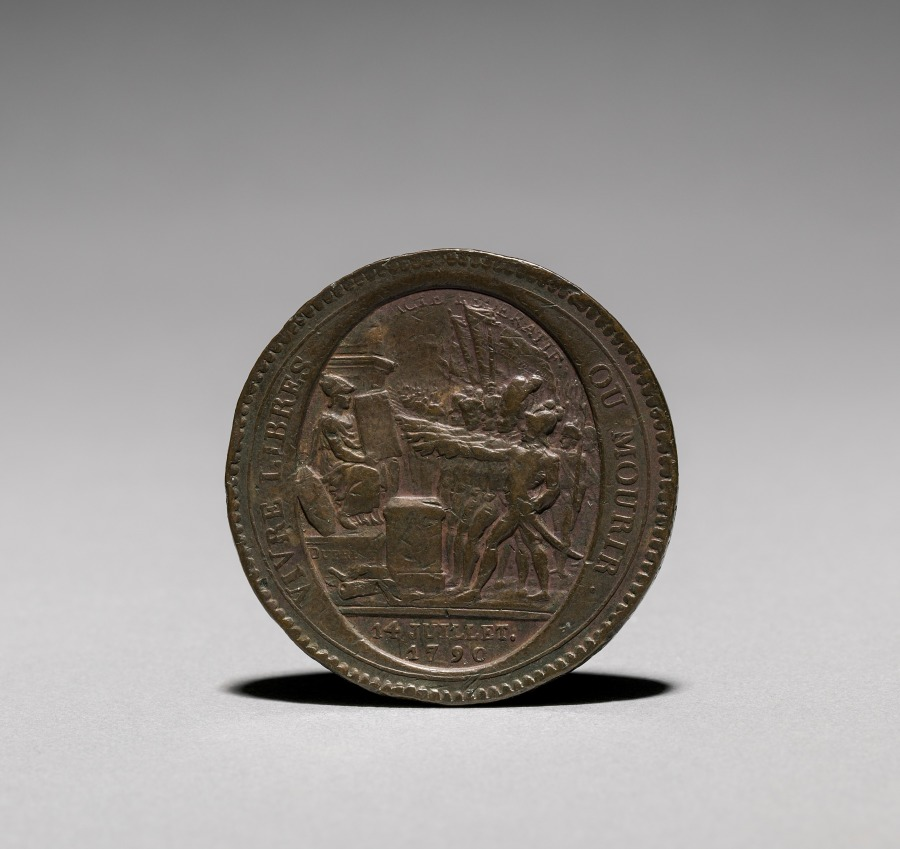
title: Medal: Five Sols issued by Monneron Brothers, Paris, 1792 (obverse)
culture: France, 19th century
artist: Jules Dupré (French, 1811–1889)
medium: bronze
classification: Metalwork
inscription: Monneron Freres Negociano. A. Paris 1792. Medalle de confiance de cinq. Sols remecursable en assignats ge 50 et audesses l'an IV dela liperte.